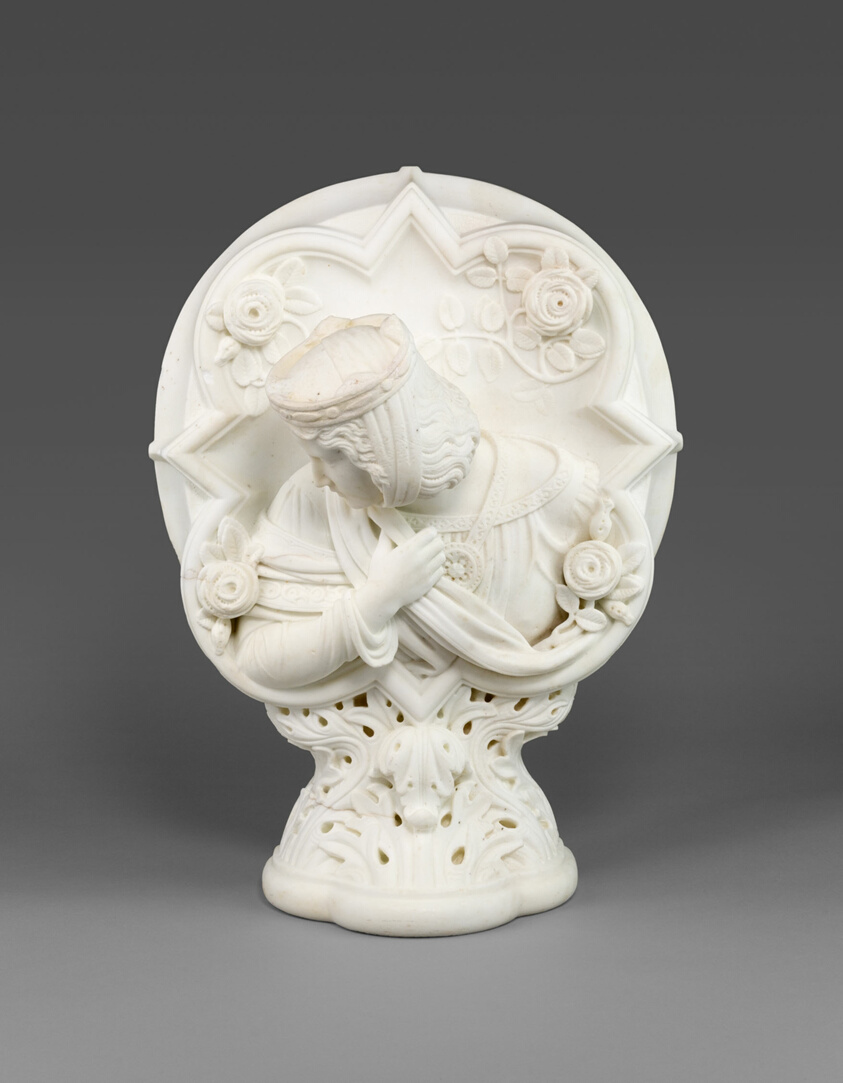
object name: Sculpture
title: Saint Elizabeth of Hungary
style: nineteenth century, 19th century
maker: Félicie de Fauveau (French, 1801–1886)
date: 1851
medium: Marble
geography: France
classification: statuette; marble; french; sculpture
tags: saints, woman, crowns, flowers, floral, floral motifs, leaf, foliage, Christian subjects, Christianity, Devotion, religion, religious, religious figures